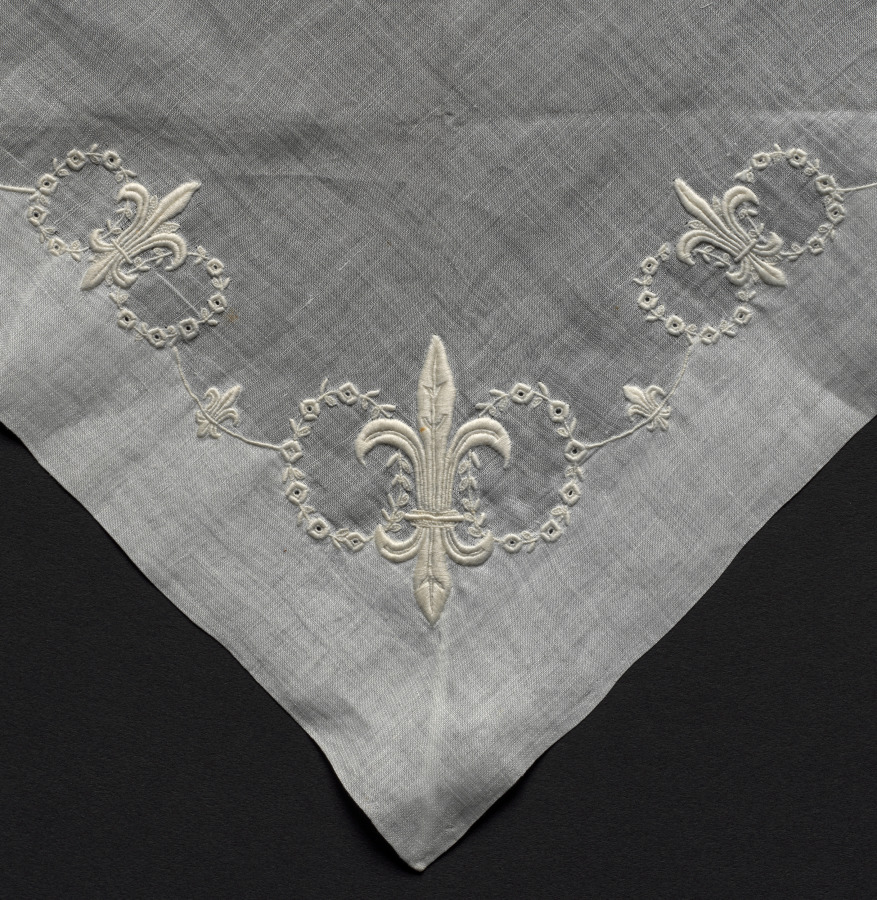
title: Handkerchief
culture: France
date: 1800s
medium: Plain weave linen: embroidered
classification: Embroidery